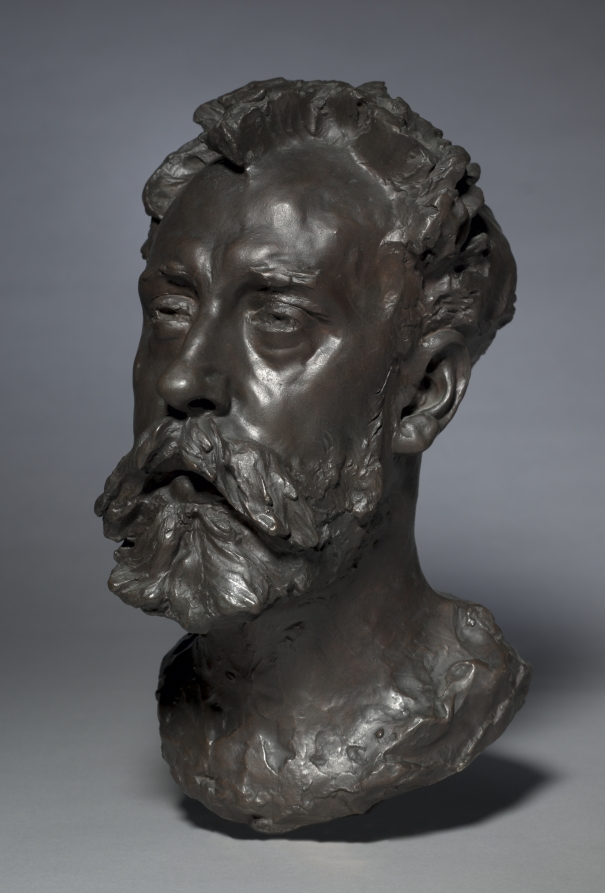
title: Portrait of William E. Henley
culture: France, 19th century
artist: Auguste Rodin (French, 1840–1917)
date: 1882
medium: bronze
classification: Sculpture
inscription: inscribed on back: Rodin.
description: A poet and dramatist, William Henley (1849–1903) was the editor of the British Magazine of Art from 1882 to 1886. He enthusiastically introduced Rodin's sculpture to his readers, even before the artist's work was well known in Paris. To thank him, Rodin made this bust.